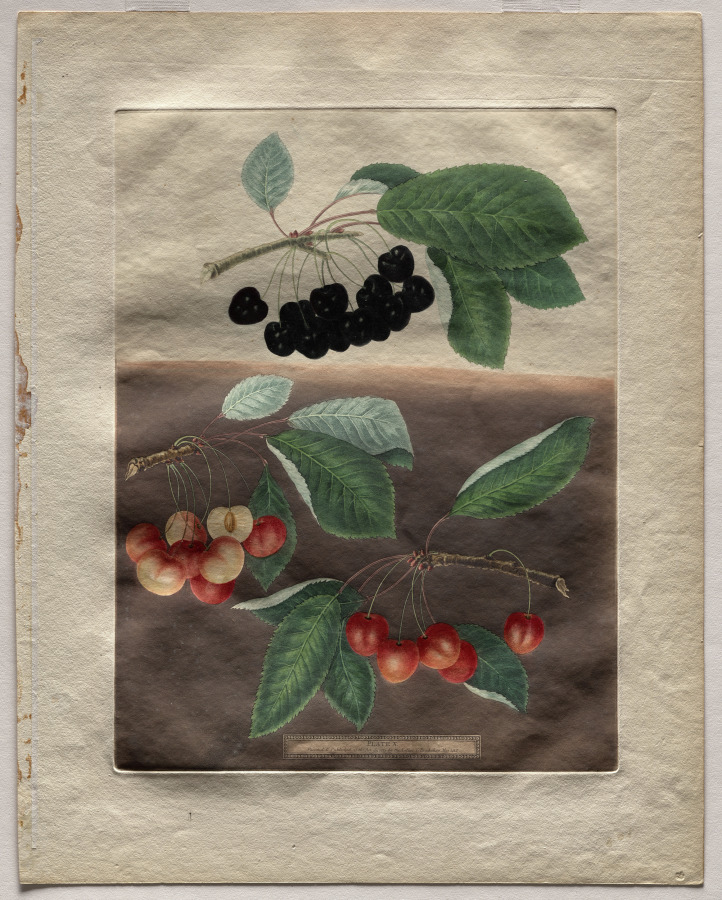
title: Pomona Britannica: No. 10 - Cherries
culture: England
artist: George Brookshaw (British, 1751–1823)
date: 1805, published 1812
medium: aquatint and stipple engraving printed in color and hand colored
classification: Print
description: This color aquatint etching is one plate from George Brookshaw’s 1812 illustrated volume Pomona Britannica. Named after the Roman goddess of fruit trees, gardens, and orchards, Brookshaw intended the volume to be the English “country gentleman’s” guide to the science of classifying and identifying fruits (pomology). Many of Brookshaw’s models came from the Royal Gardens at Hampton Court and Kensington Gardens. Each print featured one fruit, often life-size, including detailed depictions of its flower and leaves. Printed in color with hand-painted highlights, this and other illustrated botanicals formed an essential part of the cultured English library in the early 19th century.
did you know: King Henry VIII of England (r. 1508-47) ordered cherries be introduced to England after tasting them on the continent.